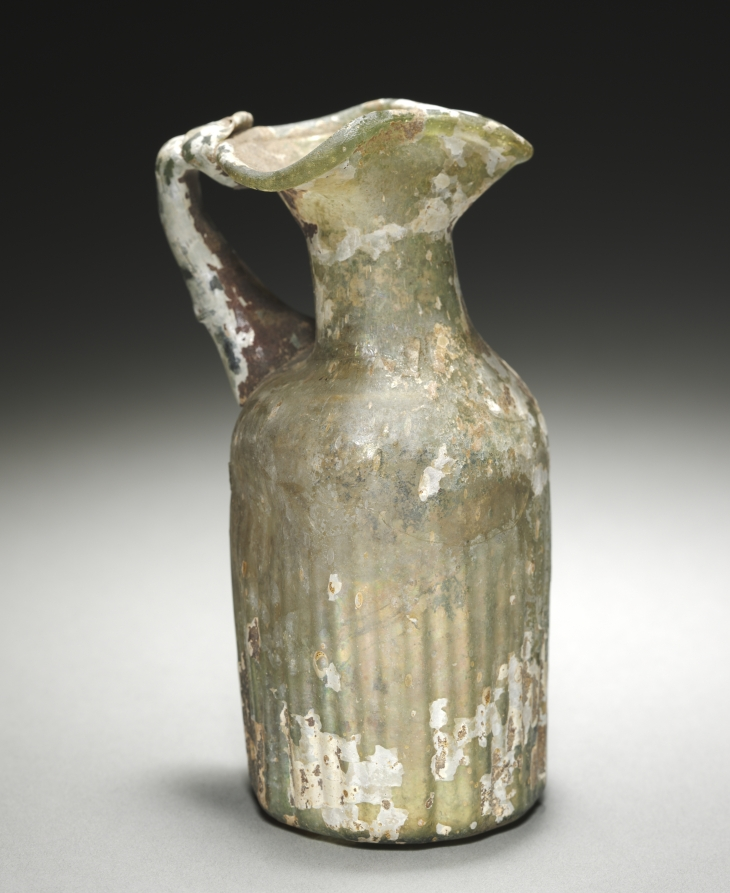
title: Jug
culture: Syro-Palestinian, Roman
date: 300s CE or later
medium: glass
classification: Glass